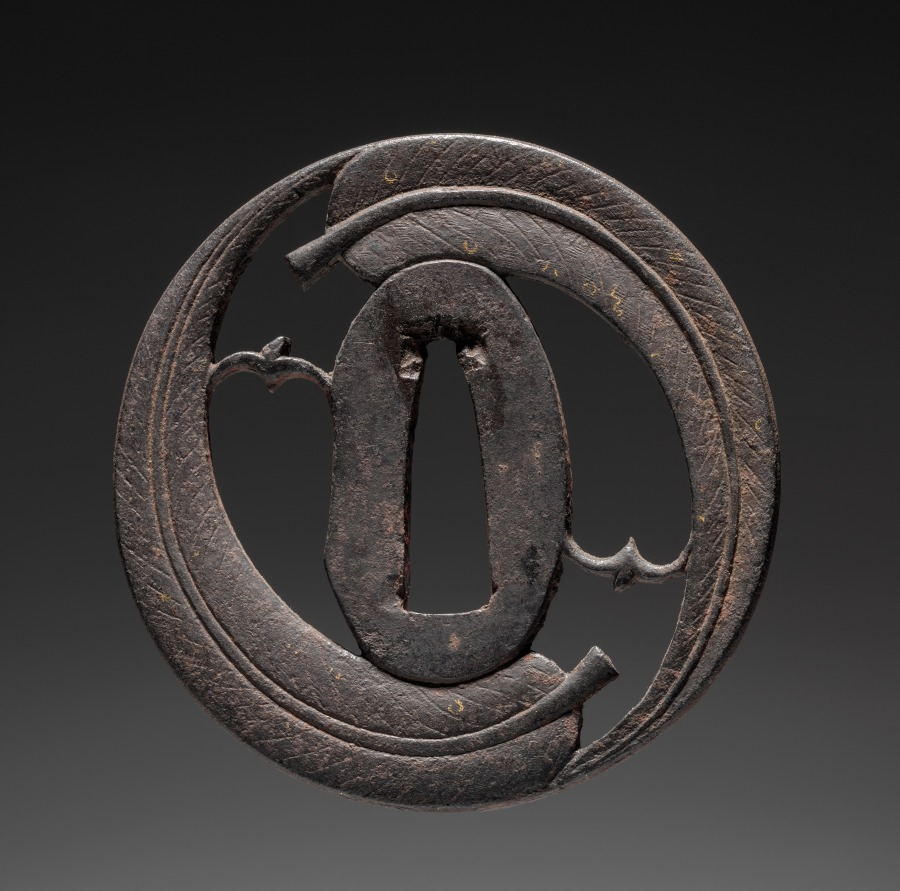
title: Sword Guard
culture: Japan, Edo period (1615–1868)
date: 1615–1868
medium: iron (Chosu type)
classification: Arms and Armor